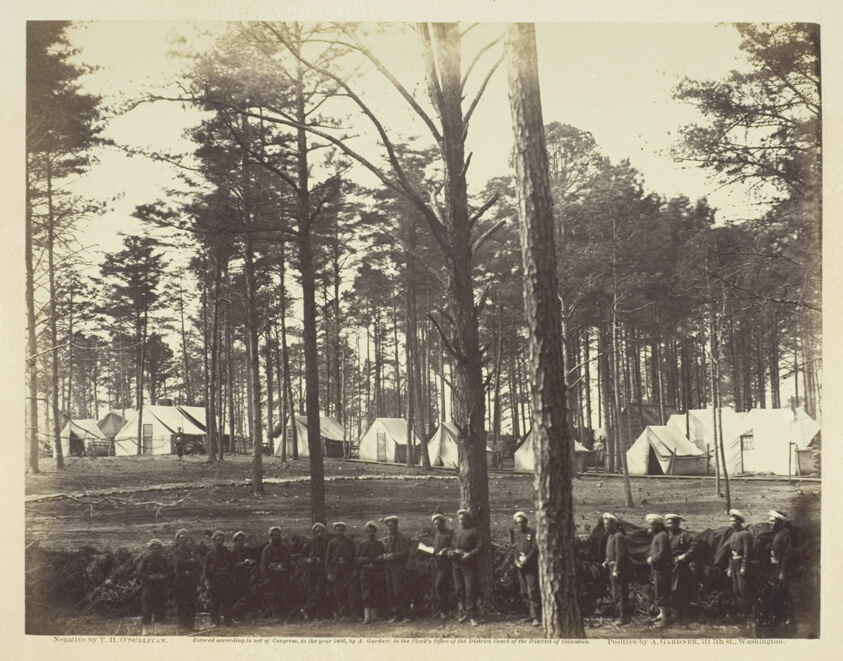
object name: Photograph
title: Head-Quarters Army of the Potomac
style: 19th century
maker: Timothy O'Sullivan (American, born Ireland, 1840–1882)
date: February 1864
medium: Albumen print, pl. 60 from the album "Gardner's Photographic Sketch Book of the War, Volume II" (1866)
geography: United States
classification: photograph; albumen silver print; photography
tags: Collected by Hugh Edwards, Gardner's Photographic Sketch Book